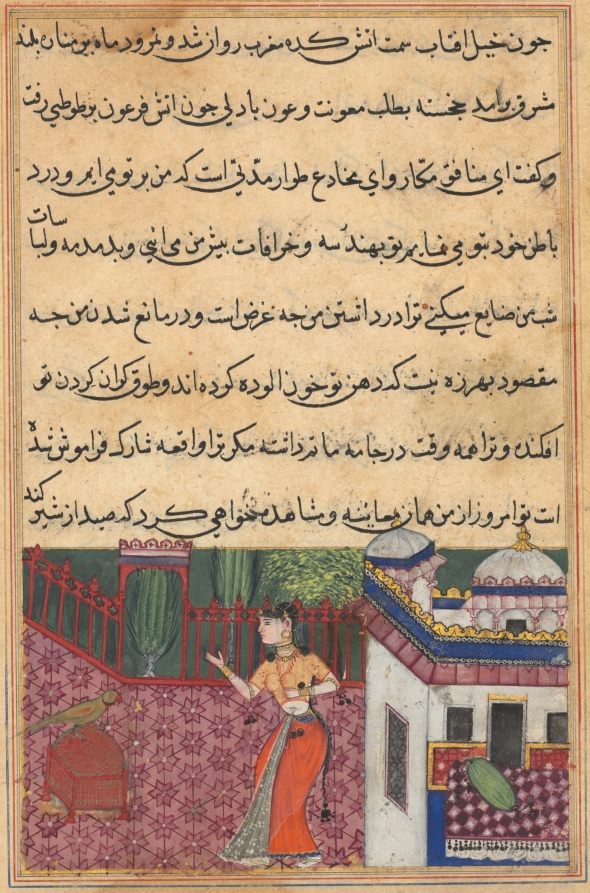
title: The parrot addresses Khujasta at the beginning of the thirty-third night, from a Tuti-nama (Tales of a Parrot)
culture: Mughal India, court of Akbar (reigned 1556–1605)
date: c. 1560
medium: gum tempera, ink, and gold on paper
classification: Painting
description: Khujasta stands in a courtyard consulting with Tuti the talking parrot before visiting her lover. Tuti begins to tell Khujasta a story that details the love of two couples who prevailed to get what they desired. By the time the parrot’s tale has ended, the sun is rising, and it is too late for Khujasta to leave.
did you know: The white domes above Khujasta’s room were originally painted with stripes.